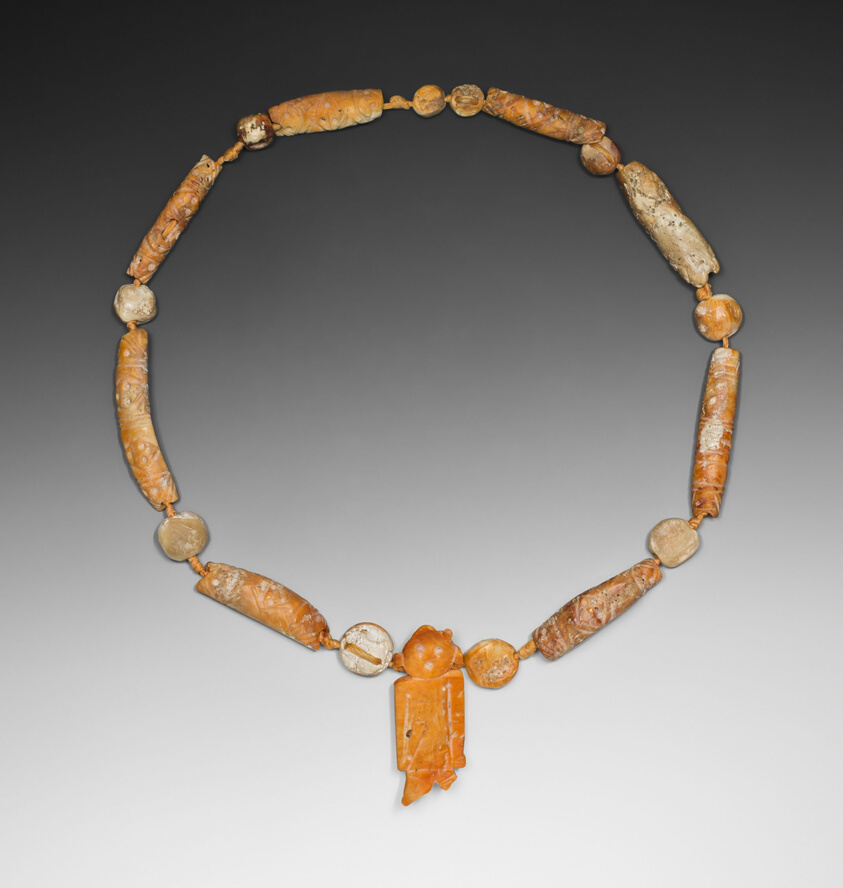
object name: Costume and Accessories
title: Necklace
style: colima, mesoamerican, Pre-Columbian, americas, jalisco, west mexico, Arts of the Americas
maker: Colima or Jalisco; Colima or Jalisco, Mexico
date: 200 BCE–200 CE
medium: Spondylus shell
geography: Western Mexico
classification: shell; art of the americas; jewelry; costume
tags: jewelry, shells, figures (representations), water